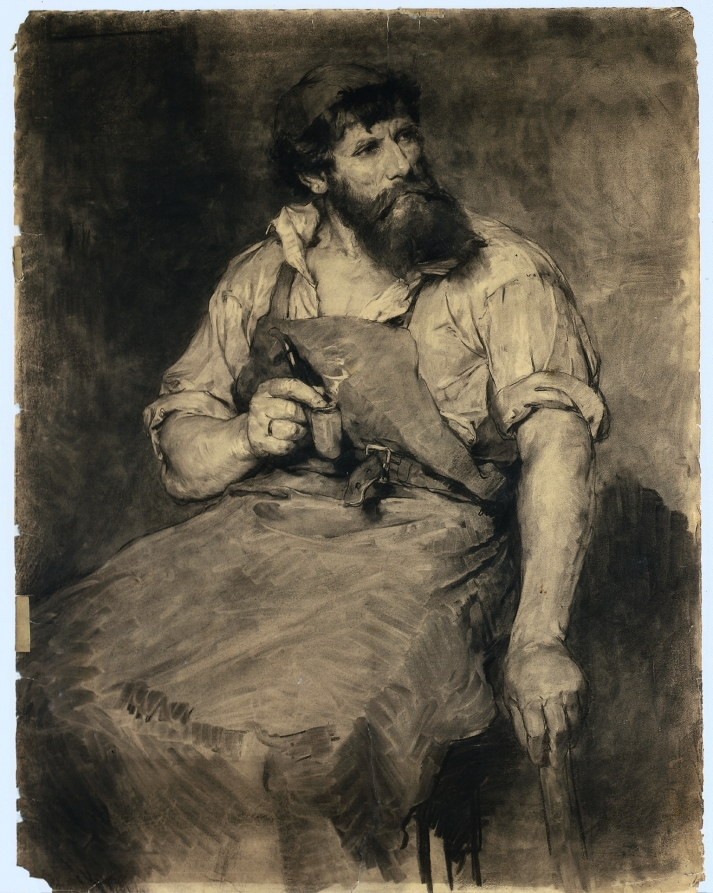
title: Smithy, study for "Das Gericht"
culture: America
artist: Samuel H. Crone (American, 1858–1913)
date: c.1883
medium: charcoal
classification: Drawing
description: Crone made Smithy while still a student at the Academy in Munich, and it reflects the style and subject matter favored there. Although it is a drawing, Smithy has the scale and impact of an oil painting. Crone executed the work in charcoal, which can be easily smudged, smeared, and manipulated. The artist used a brush or some other instrument to create large, painterly strokes, perhaps using water or another liquid to help him create brushy effects. This is especially impressive in the blacksmith's apron. Crone also chose a brown paper that exemplifies the dark tones of the Munich School. The drawing is related to a painting that became Crone's best-known work: The Judgement (Das Gericht). The painting was shown at an important exhibition in 1883 and, though lost today, is known from a reproduction that appeared in the exhibition's catalogue. The work depicted a burly blacksmith considering what to do about a young boy caught stealing apples in his shop. The present drawing clearly shows the same bearded model, though he is in a different pose: seated and holding a pipe. The figure has an impressive monumentality, dignity, and scale. The size of the sheet is unusual for a study drawing, and Crone no doubt intended it to stand as an independent work.